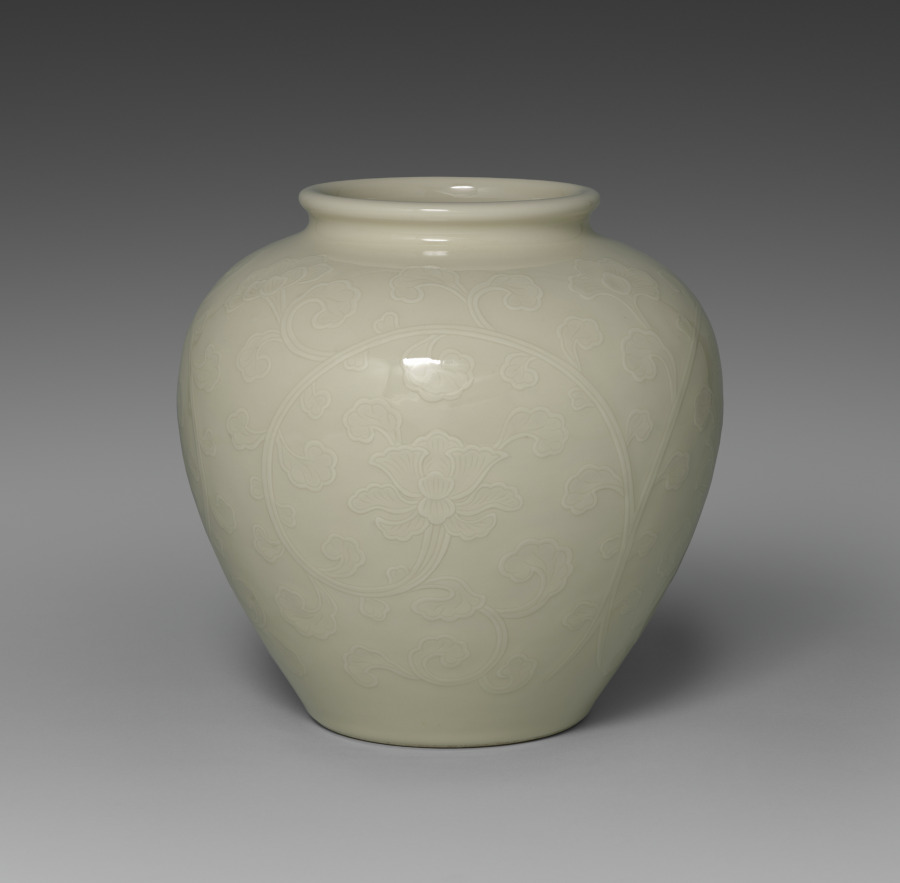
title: Guan-Shaped Vessel with Floral Scroll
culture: Japan, Taishō period (1912–26) or Shōwa period (1926–89)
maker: Seifū Yohei IV (Japanese, 1872–1951)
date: 1914–46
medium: Porcelain with molded and carved design and cream glaze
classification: Ceramic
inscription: 清風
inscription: 清風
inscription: 清風造之 【印】成山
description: Many of the vases created by Yohei III and IV were made with reference to and in emulation of Chinese ceramics in both form and glazing. The Seifu studio was inspired by later Chinese copies of two other archaic vessel types, the hu (Japanese ko) and guan (Japanese kan). In simple terms, in their original contexts, the hu and guan were storage jars that also appeared in ritual contexts. This hefty guan-shaped vase by Yohei IV has a floral scrolling pattern known in Japanese as karakusa, or “Chinese grasses.” The flowers are generally identified as lotus or peony. This flower vase might alternately be categorized as having the form of what is called a shukaiko in Japan, or a large vessel for holding wine. Shukaiko were created as early as the latter part of the Kamakura period after Yuan dynasty examples.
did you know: According to the box lid, the vase is a kanpakuji, "bright-jewel white porcelain," work.